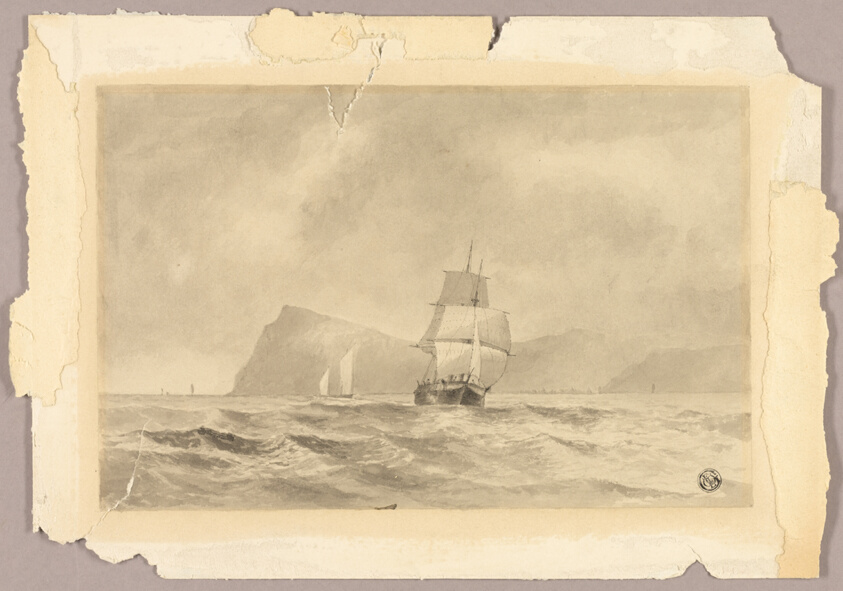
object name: Drawing and Watercolor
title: Off Whitby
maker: Attributed to Edward William Cooke; English, 1811-1880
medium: Brush and gray wash, with pen and black ink, on cream wove paper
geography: England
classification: ink or chalk wash; drawings (visual works); prints and drawing